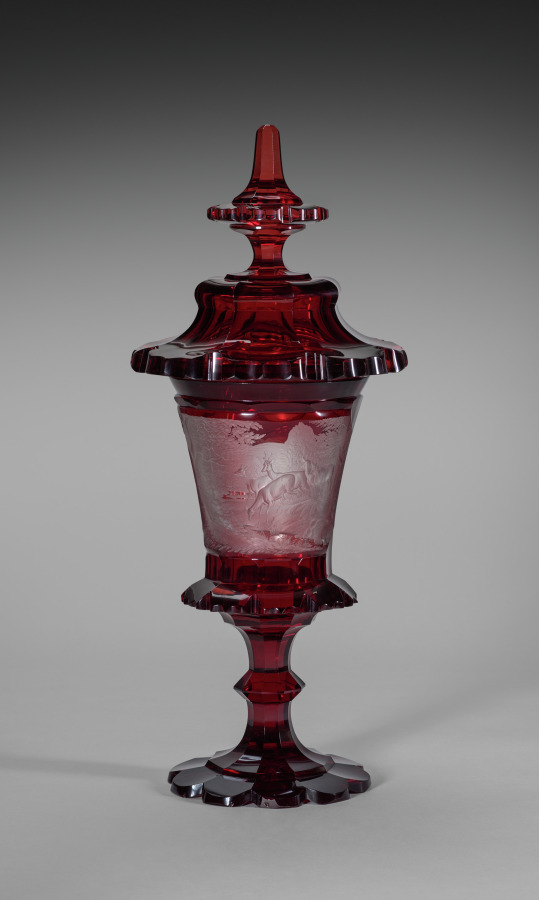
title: Covered Cup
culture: Bohemia, 19th century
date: mid-1800s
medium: ruby glass with engraved decoration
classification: Glass